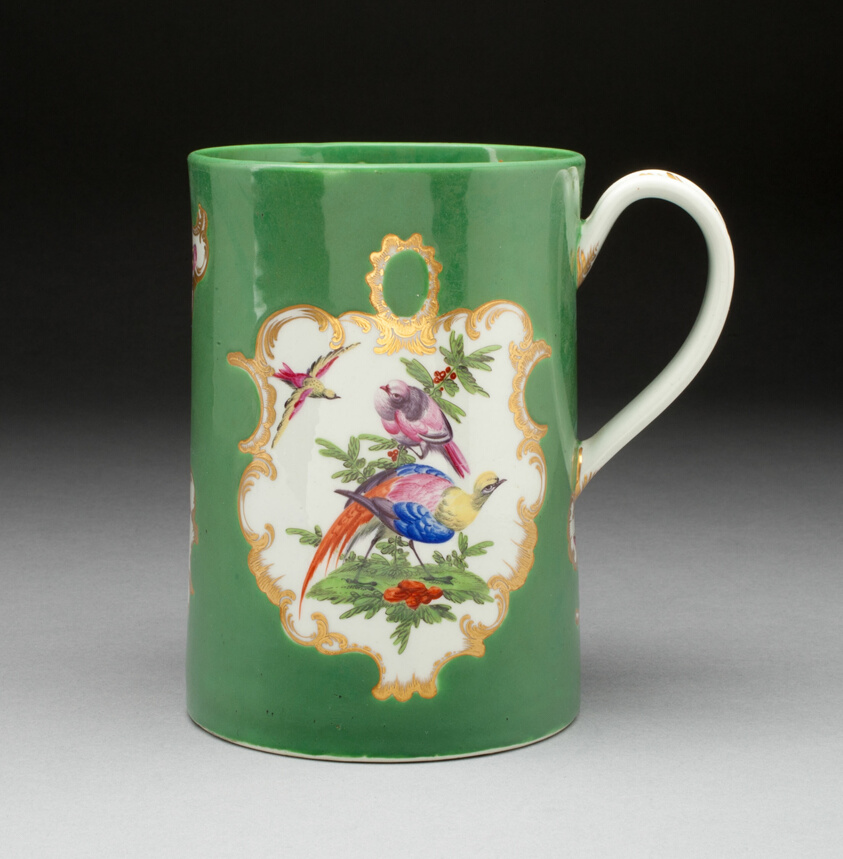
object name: Ceramics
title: Mug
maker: Worcester Porcelain Factory (Warmstry House Period, 1751–1783); Worcester, England, founded 1751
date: 1765/75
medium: Soft-paste porcelain, polychrome enamels and gilding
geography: Worcester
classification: ceramics; tableware; porcelain; european decorative arts